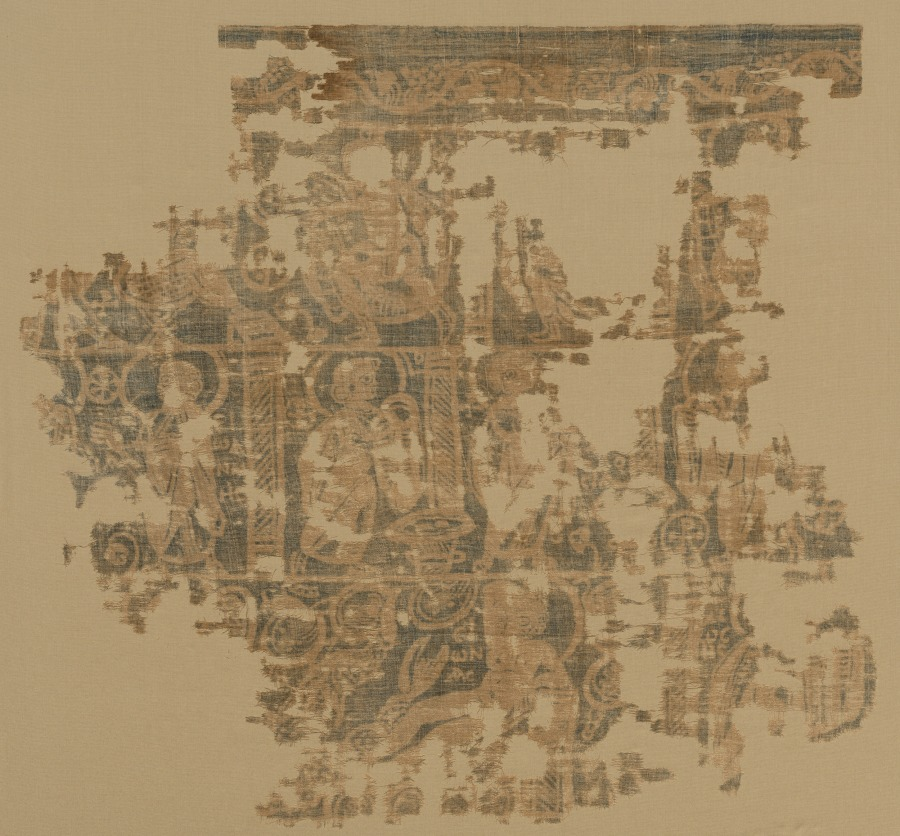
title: Resist-Dyed Hanging with Biblical Scenes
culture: Egypt, Byzantine period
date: 500–550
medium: linen: resist-dyed, plain weave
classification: Textile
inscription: Greek inscriptions identify the various scenes from the Old and New Testaments. Above the first of the Magi in the upper register can be seen the two letters "XP" from the Greek work for gold. At the left of the middle register are two figures, the first almost destroyed and the second identified by the inscription, "EIWANNHC," as John. In the lower register is a portrayal of Jonah thrown up on the shore with the big fish beside him and accompanied by the inscription, "EIWNAC." Moses, almost completely destroyed, is only identifiable by his inscription, "MWCHC."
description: This hanging textile features biblical scenes that early Christian people would have recognized. At left, the upper register shows the Virgin Mary and Christ child on a cross-legged stool. As a Coptic inscription indicates, the three kings approach from the right, carrying gifts. The middle register on the left may depict the baptism of Christ while the other three figures separated by columns appear to illustrate a New Testament miracle in which Christ feeds a large crowd with only five loaves of bread and two fish. In the lower register, the Old Testament scene of the prophet Jonah being swallowed by a whale is still recognizable.